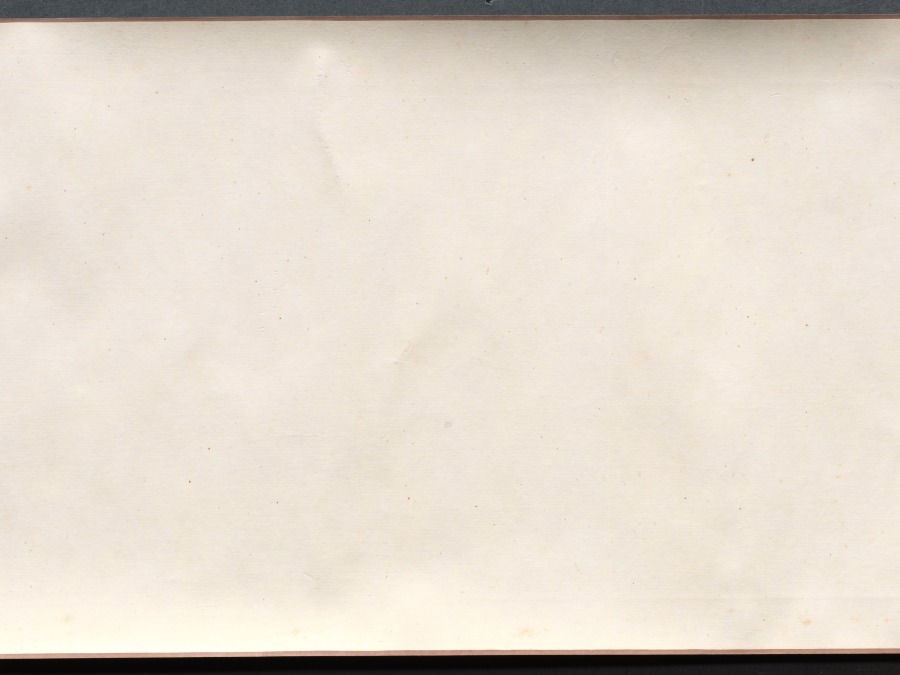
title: Four Poems: Calligraphy in Cursive Script (xingshu)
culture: China, Ming dynasty (1368–1644)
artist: Chen Jiru (Chinese, 1558–1639)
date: 1500s-1600s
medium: handscroll; ink on gold speckled paper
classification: Calligraphy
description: Written in graceful calligraphy with well-composed characters, the artist communicates his thoughts and state of mind in four poems. Characters written in dark, thick strokes convey rhythm, and indicate the moment after the writer had paused to recharge his brush with ink. Chen Jiru was a native of Huating (modern Shanghai). His calligraphy style resembles that of his friend, influential calligrapher Dong Qichang (1555–1636). Unlike Dong, Chen did not pursue government service: he burned his Confucian robes, declined a summons to serve at court, and immersed himself in literature, calligraphy, and painting.